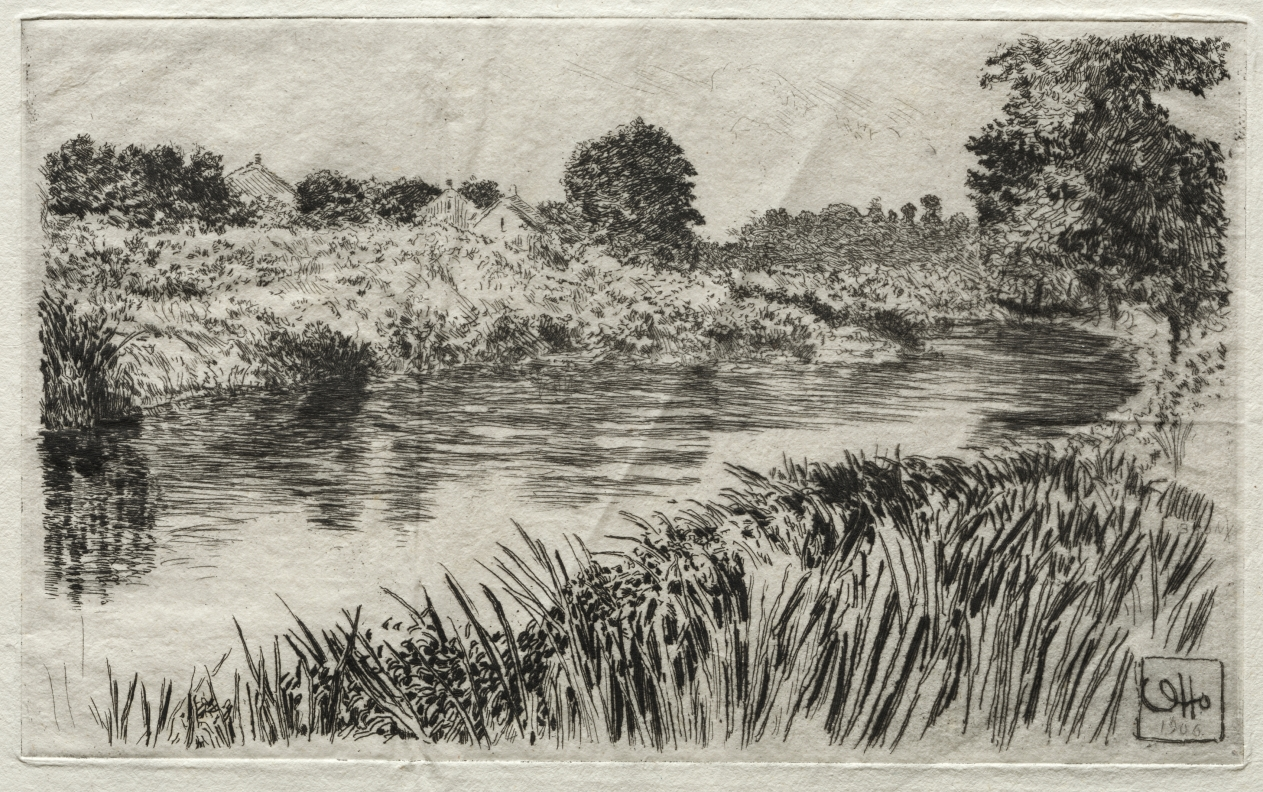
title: On the Bronx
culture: America, early 20th Century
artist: Otto H. Bacher (American, 1856–1909)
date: 1906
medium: etching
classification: Print